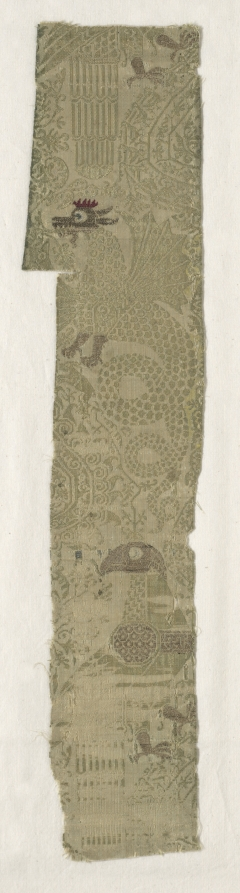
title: Silk Fragment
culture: Spain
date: 1200s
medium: lampas weave, brocaded; silk and gold thread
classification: Textile